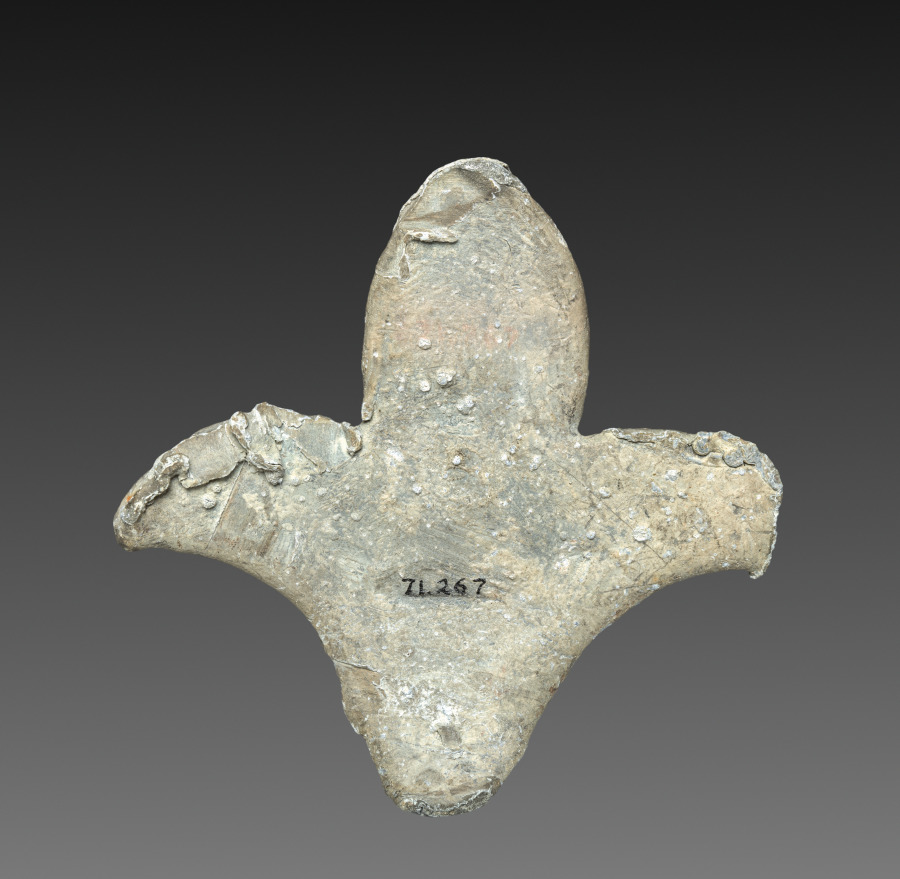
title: Fleur de Lys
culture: France(?)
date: 1700s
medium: lead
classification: Sculpture